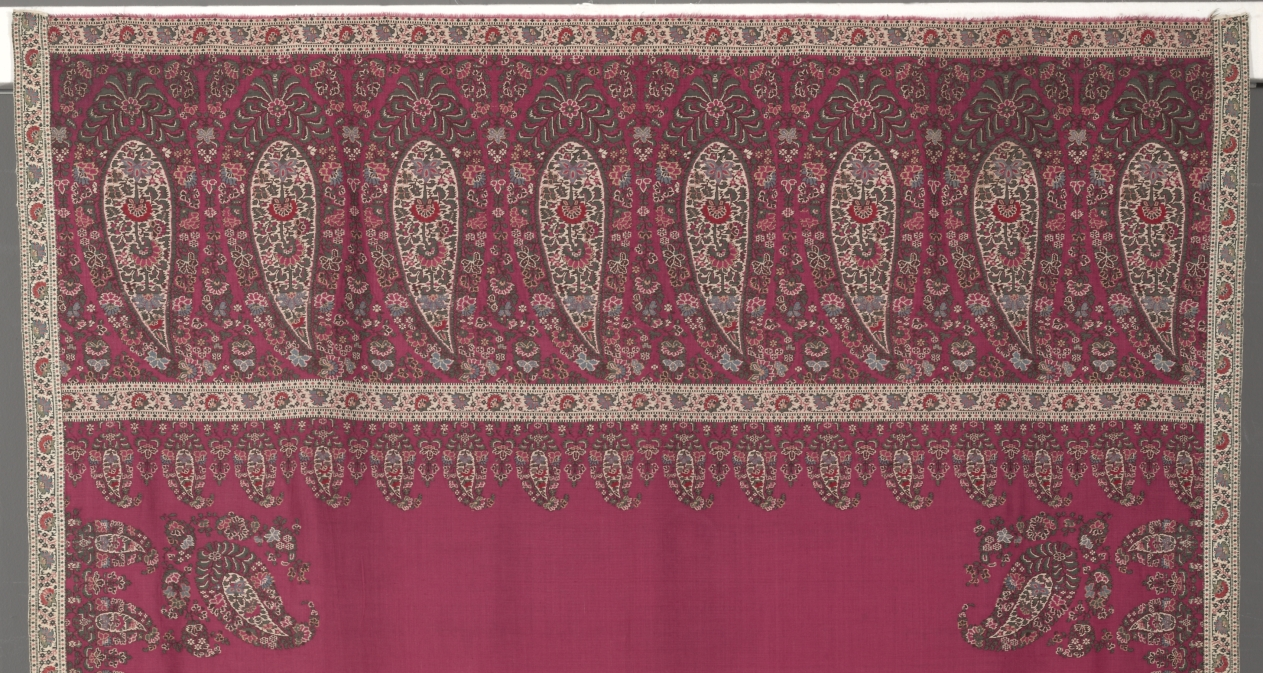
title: Long Shawl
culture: Europe (England, Scotland or France), 19th century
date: c. 1825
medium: 2/2 twill (S) weave ground with supplementary weft pattern in 3/1 (S) weave twill; silk; attached vertical border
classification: Textile